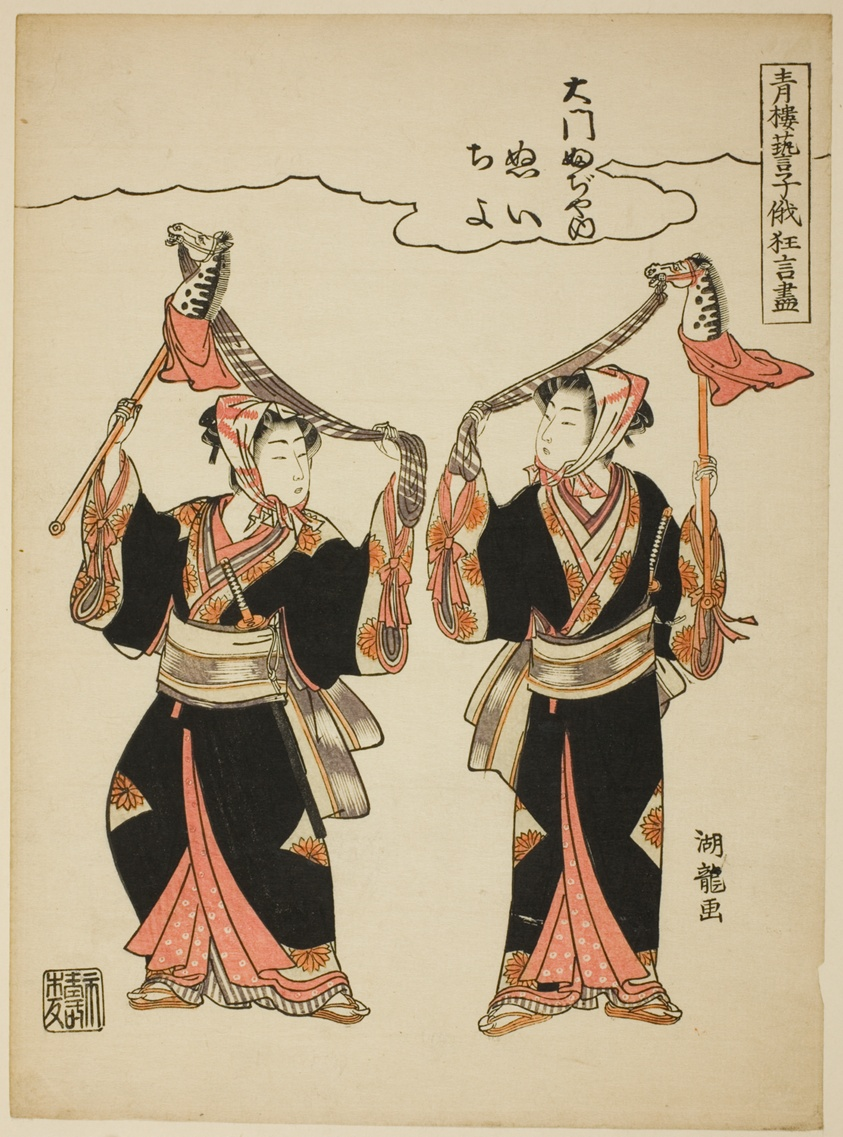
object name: Print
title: Nui and Chiyo from Daimon Fujiya performing the hobby-horse dance, from the series "Comic Performances by the Entertainers of the Pleasure Quarters at the Niwaka Festival (Seiro geiko niwaka kyogen zukushi)"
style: Japanese (culture or style)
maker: Isoda Koryusai (Japanese, 1735-1790)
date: c. 1776/81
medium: Color woodblock print; chuban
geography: Japan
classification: woodblock print; print; asian art